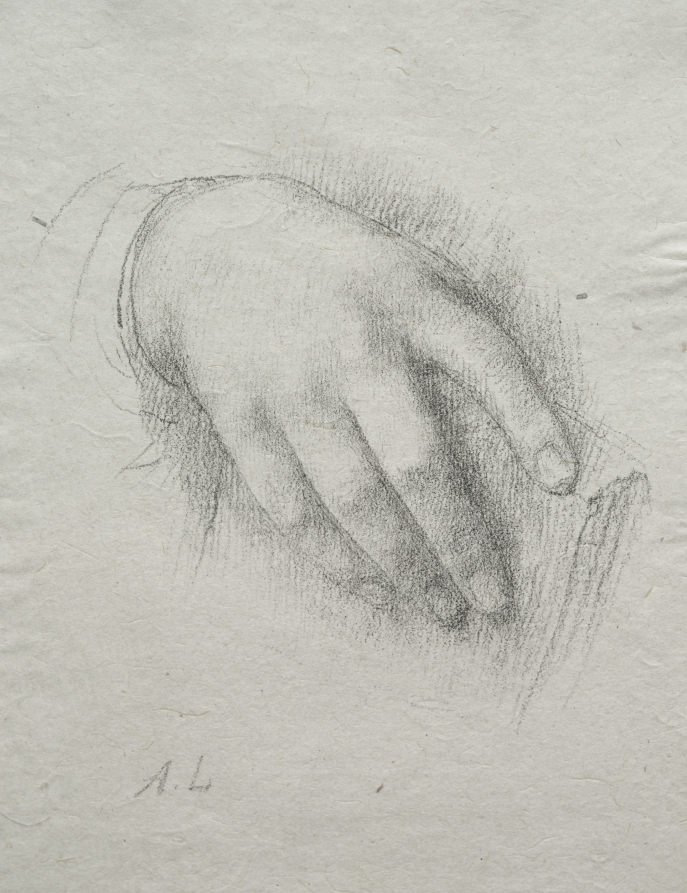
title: The Hand of Nora E. Legros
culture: France, 19th century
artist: Alphonse Legros (French, 1837–1911)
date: c. 1890–1904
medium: lithograph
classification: Print